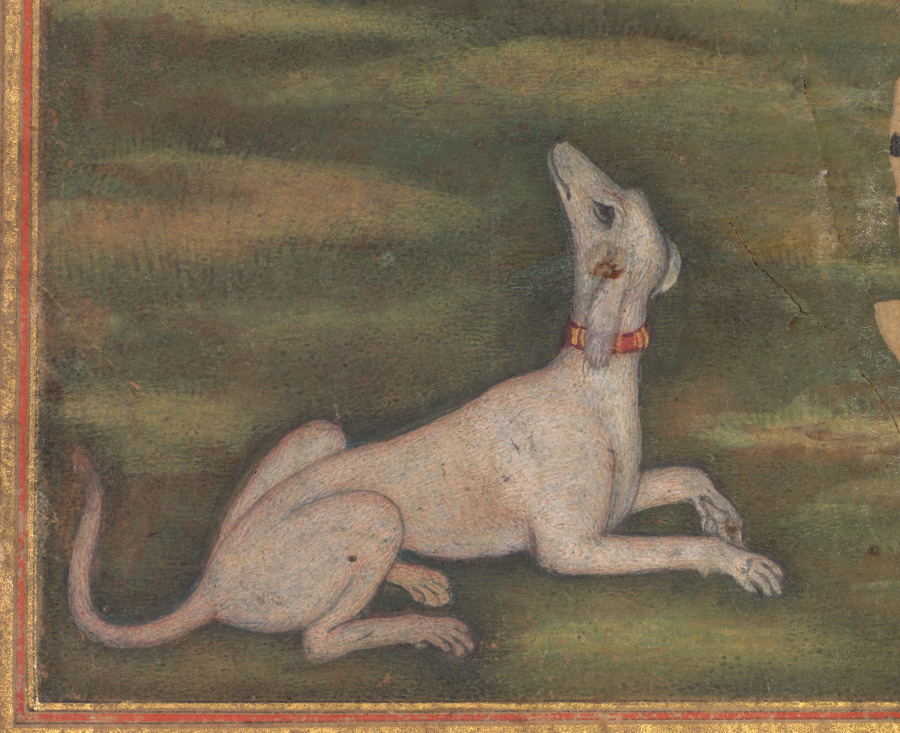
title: The Annunciation (folio 15 recto), from a Mirror of Holiness (Mir’at al-quds) of Father Jerome Xavier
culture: Mughal India, Allahabad, made for Prince Salim (1569–1627)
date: 1602–4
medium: Gum tempera, ink, and gold on paper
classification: Manuscript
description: Mary gazes down at the angel Gabriel as he kneels reverently, like a humble messenger, delivering the news that Mary will give birth to the son of God. His multicolored wings are forced within the boundary line of the painting field, visually implying a sense of subordination. Unlike many of the paintings in the Mirror of Holiness, the Annunciation is a familiar subject in European art, but the emphases vary. The Indian version depicts her as a queen, with a crown held above her head and attendants standing by.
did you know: The text states that Mary was only age 13 1/2 when the angel Gabriel came to her.